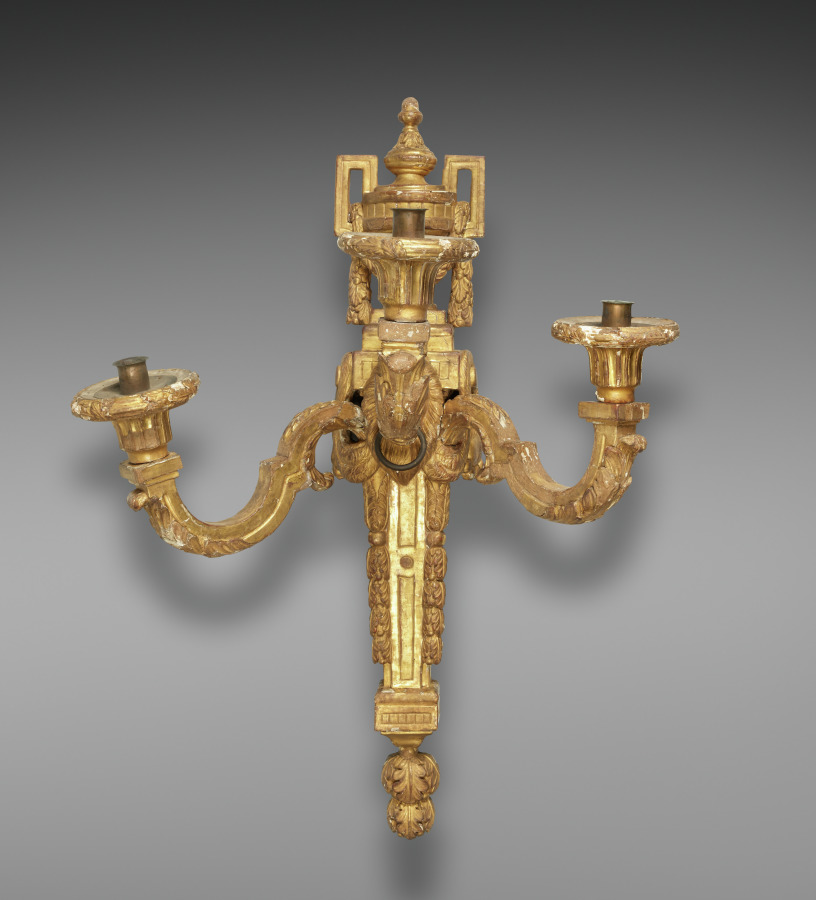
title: Candle Bracket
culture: France, style of Louis XVI, 18th century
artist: after a design by Jean Charles Delafosse (French, 1734–1789)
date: c. 1765–1775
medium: carved and gilded wood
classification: Furniture and woodwork